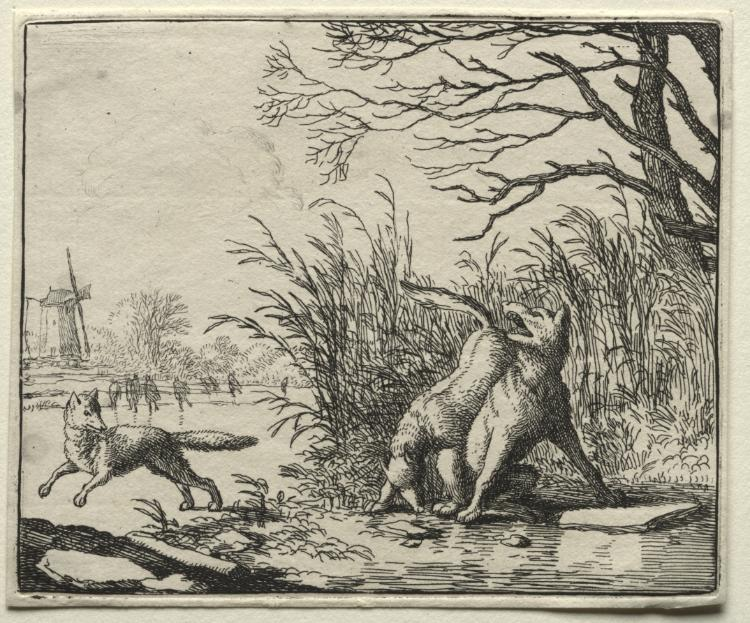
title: Reynard the Fox: A New Accusation by the Wolf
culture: Netherlands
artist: Allart van Everdingen (Dutch, 1621–1675)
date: 1650–75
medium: etching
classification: Print